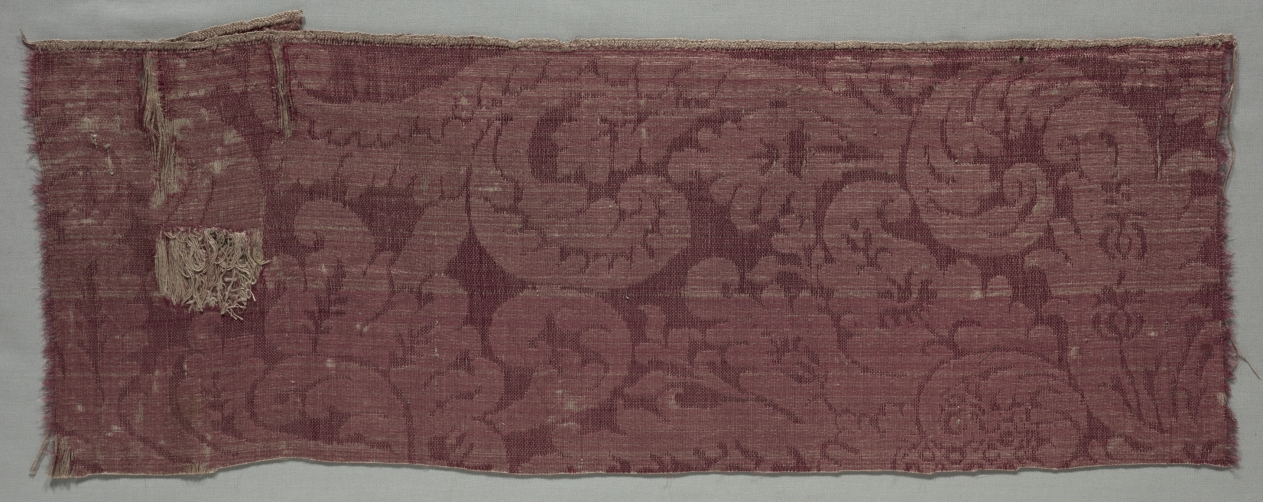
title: Satin Textile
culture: Italy, late 17th century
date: late 1600s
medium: plain compound satin; silk and linen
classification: Textile